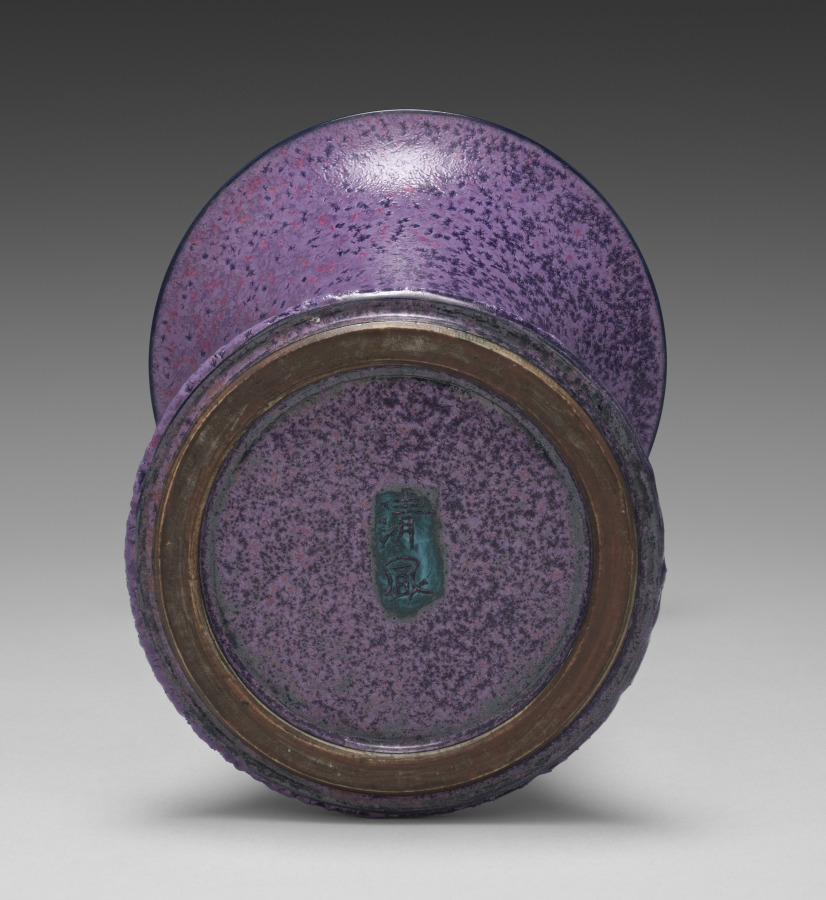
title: Gu-Shaped Vase with Patina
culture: Japan, Taishō period (1912–26) or Shōwa period (1926–89)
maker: Seifū Yohei IV (Japanese, 1872–1951)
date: 1914–46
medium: Porcelain with overglaze color enamel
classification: Ceramic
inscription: 清風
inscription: 成山清風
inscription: 清風造 【印】 清風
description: Yohei IV’s interest in bold, colorful designs is on full display in this purple gu-shaped vase. He not only exhibits his penchant for bold colors but also shows off a complex surface that suggests the patina on an ancient bronze. The body of the vase is a dark, greenish blue over which there is a thick application of color. While the predominant overlaid color is lavender purple, salmon pink and cornflower blue appear in places along with myriad nearly black forms, perhaps floating dandelion seeds or tiny flowers, scattered over the surface.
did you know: The glaze recalls in some respects a Chinese glaze named “snowflake blue,” or xuehualan (Japanese sekka’ai), a low-fired lead-fluxed glaze.